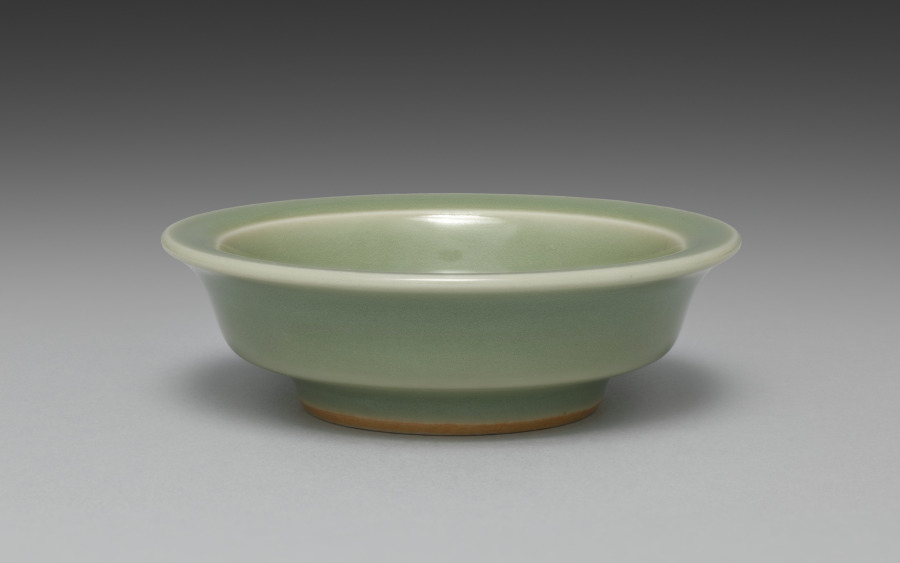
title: Saucer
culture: Japan, Meiji period (1868–1912)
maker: Seifū Yohei III (Japanese, 1851–1914)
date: 1893–1914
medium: One from a set of ten dishes; porcelain with green glaze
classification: Ceramic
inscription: 清風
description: Yohei III’s main output for his sophisticated clientele was in the form of tea sets and dining sets. He created a range of dishes in green glazes. He often produced in pairs, sets of five, or sets of ten. For this set of ten small dishes in a simple, round form that emphasizes the glaze above all, the box lid designates the piece as seiji, or green-glazed porcelain, using a general term for the extensive palette of green glazes often called celadon in English. The box lid further identifies the dishes themselves as tōchō, literally “bean-sized saucers,” a size that makes them suitable for dipping sauces.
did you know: The ten dishes in this set are stored in stacks of five in a two-compartment box.